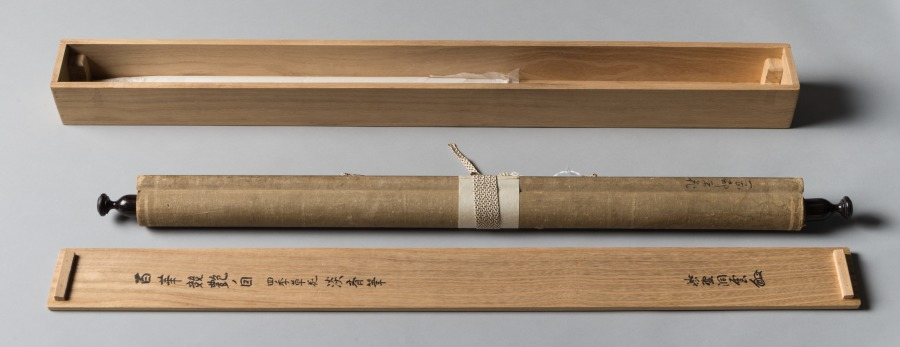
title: Vase of Flowers with Grasshopper, Marine Life, and Garden Rock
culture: Japan, Meiji period (1868–1912)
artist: Okabe Ko (Japanese)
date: late 1800s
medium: hanging scroll; ink and color on silk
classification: Painting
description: A great interest in Western scientific studies developed in Japan during the late Edo period (1615-1868) and into the Meiji era (1868-1912). One outcome of this phenomenon in the visual arts was the detailed portrayal of plant, animal, and marine life. This painting is an assemblage of objects carefully observed from nature, but not usually seen together.